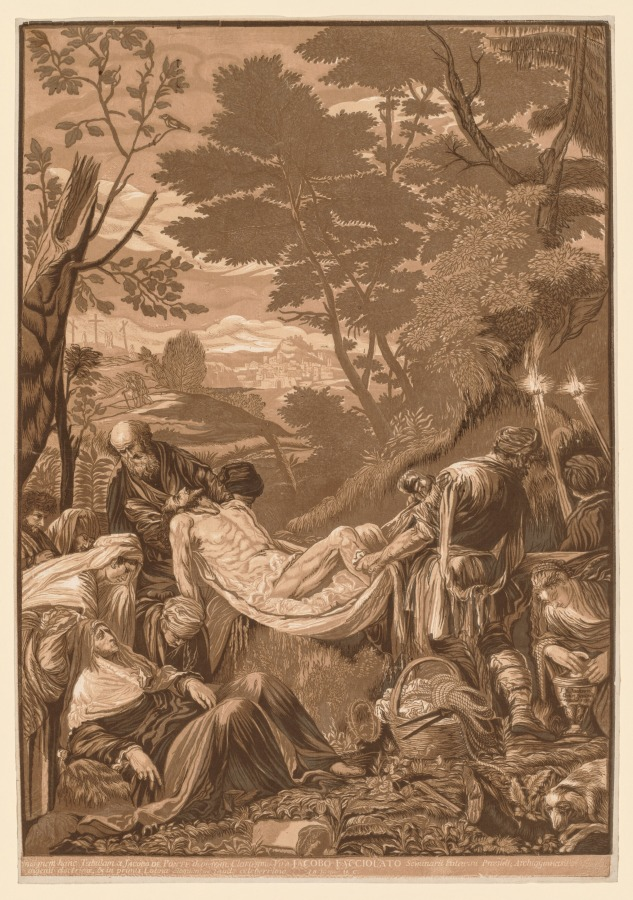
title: Venetian Set: Entombment of Christ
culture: England, 18th century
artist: John Baptist Jackson (British, 1701-c. 1780)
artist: after Jacopo Bassano (Italian, c. 1510–1592)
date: 1739–43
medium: chiaroscuro woodcut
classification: Print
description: Jackson is the best known 18th-century specialist in chiaroscuro woodcuts. Woodcuts were not popular at this time, and the chiaroscuro technique never took hold in England, but he may have developed his interest in the medium from the Italian nobleman and printmaker Antonio Zanetti who reproduced his collection of Parmigianino drawings as chiaroscuros when in England around 1720. Jackson moved to Venice, where, in 1739, the great English patron Consul Joseph Smith and two other supporters commissioned him to produce chiaroscuro woodcuts after 17 paintings by the Venetian masters Titian, Paolo Veronese, Tintoretto, and Jacobo Bassano. Jackson completed the series in 1743, which was published by J. B. Pasquali in 1745 as a bound volume. These reproductions of masterpieces were meant as souvenirs for the tourist trade and the young gentlemen taking the Grand Tour of the Continent to further their education. Jackson's Venetian Set was the first large-scale group of chiaroscuro woodcuts to reproduce oil paintings. In order to capture the effects of color and light in the paintings, he created complex, virtuosic woodcuts with a multitude of lines and tones.